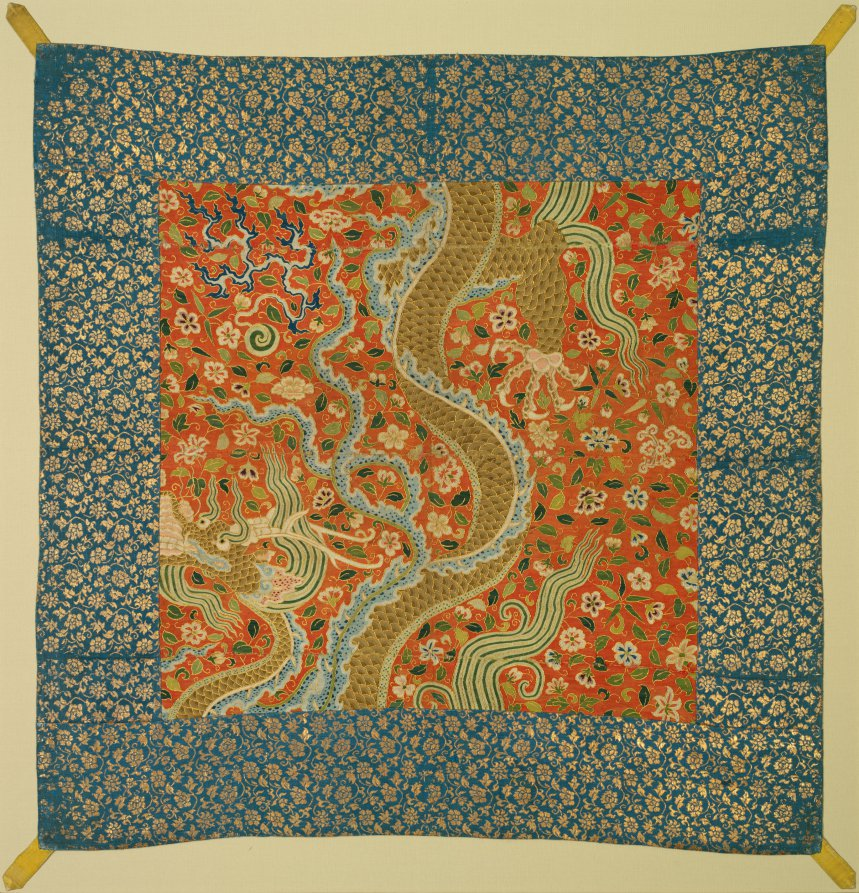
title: Canopy with Dragon among Flowers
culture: China, Center: Southern Song dynasty (1127-1270) Border: Ming dynasty (1368-1644)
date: 1100s/1400s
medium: Center: silk, gold, tapestry weave (kesi). Border: silk, gold, lampas weave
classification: Textile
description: The tapestry sewn into the center of this canopy depicts dragons among flowers, a classic design in Chinese art. Its weavers paid attention to fine details, such as the color gradation of the dragon’s scales, or subtle color changes in the flower petals and leaves. The selection of colored silk threads is soft in tone but rich in variety. All these stylistic characteristics indicate that this tapestry was woven in an imperial Southern Song workshop in the capital of Hangzhou, a center of textile production in the Jiangnan region.